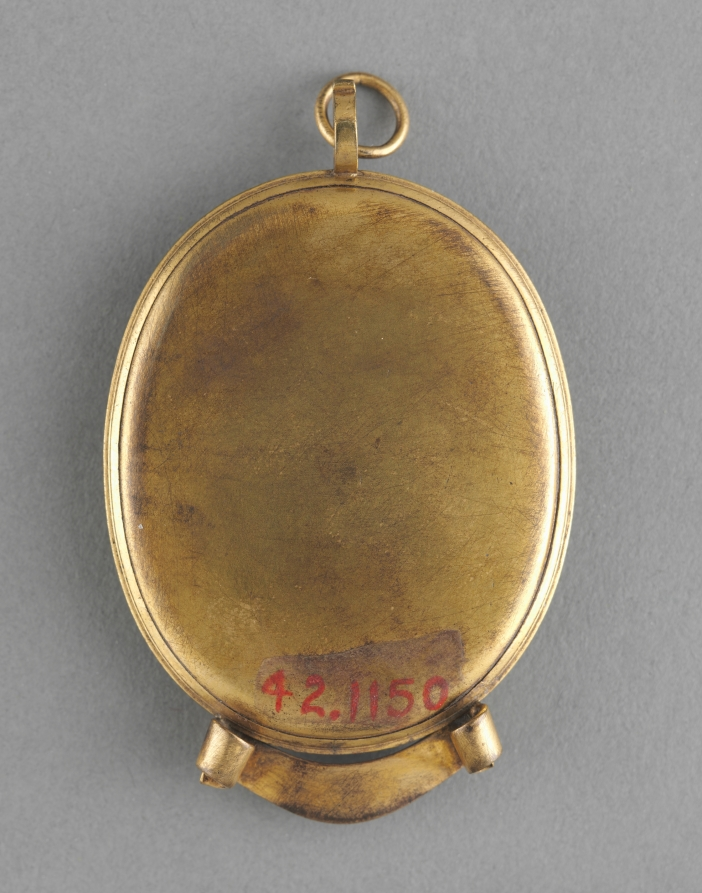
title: Portrait of a Man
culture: England, 17th century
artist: manner of Nicholas Hilliard (English, c. 1547–1619)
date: c. 1600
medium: watercolor on vellum with a gold border in a gilt metal frame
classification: Portrait Miniature